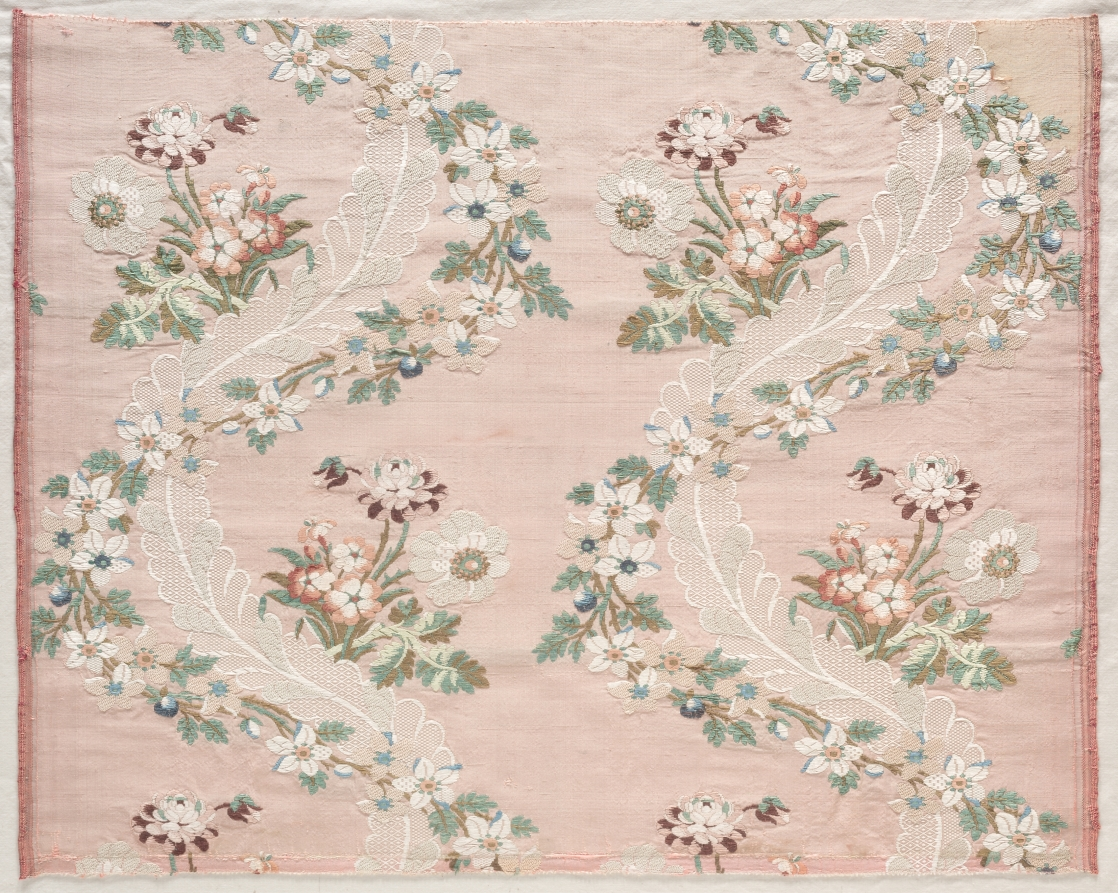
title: Taffeta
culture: France, 18th century, Period of Louis XV (1723-1774)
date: c. 1760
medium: taffeta, brocaded; silk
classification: Textile